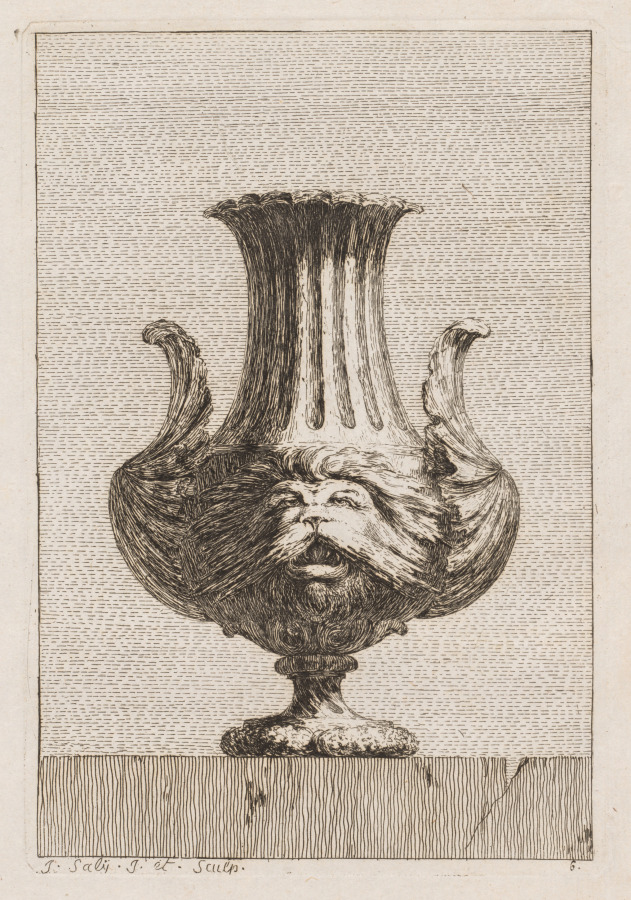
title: Suite of Vases: Plate 6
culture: France, 18th century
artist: Jacques François Saly (French, 1717–1776)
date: 1746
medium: etching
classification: Print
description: Trained as a sculptor, Saly etched a series of 30 vase designs while studying at the Académie de France in Rome. After his return to Paris, the publication announcement for the Suite of Vases endorsed the prints as an indication of the sculptor’s ingenuity and freedom of design. The vase designs also nourished an appetite for the revival of classical elements, or Neoclassicism, in decorative arts that developed in the mid-18th century.